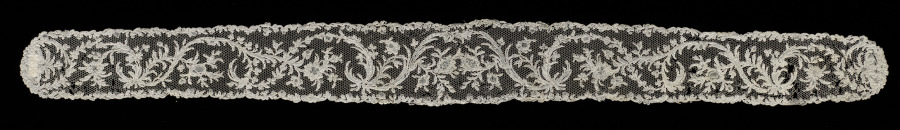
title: Lace Lappet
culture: France, Argentan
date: 1715–74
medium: Linen: needle lace (Point de Argentan)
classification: Lace